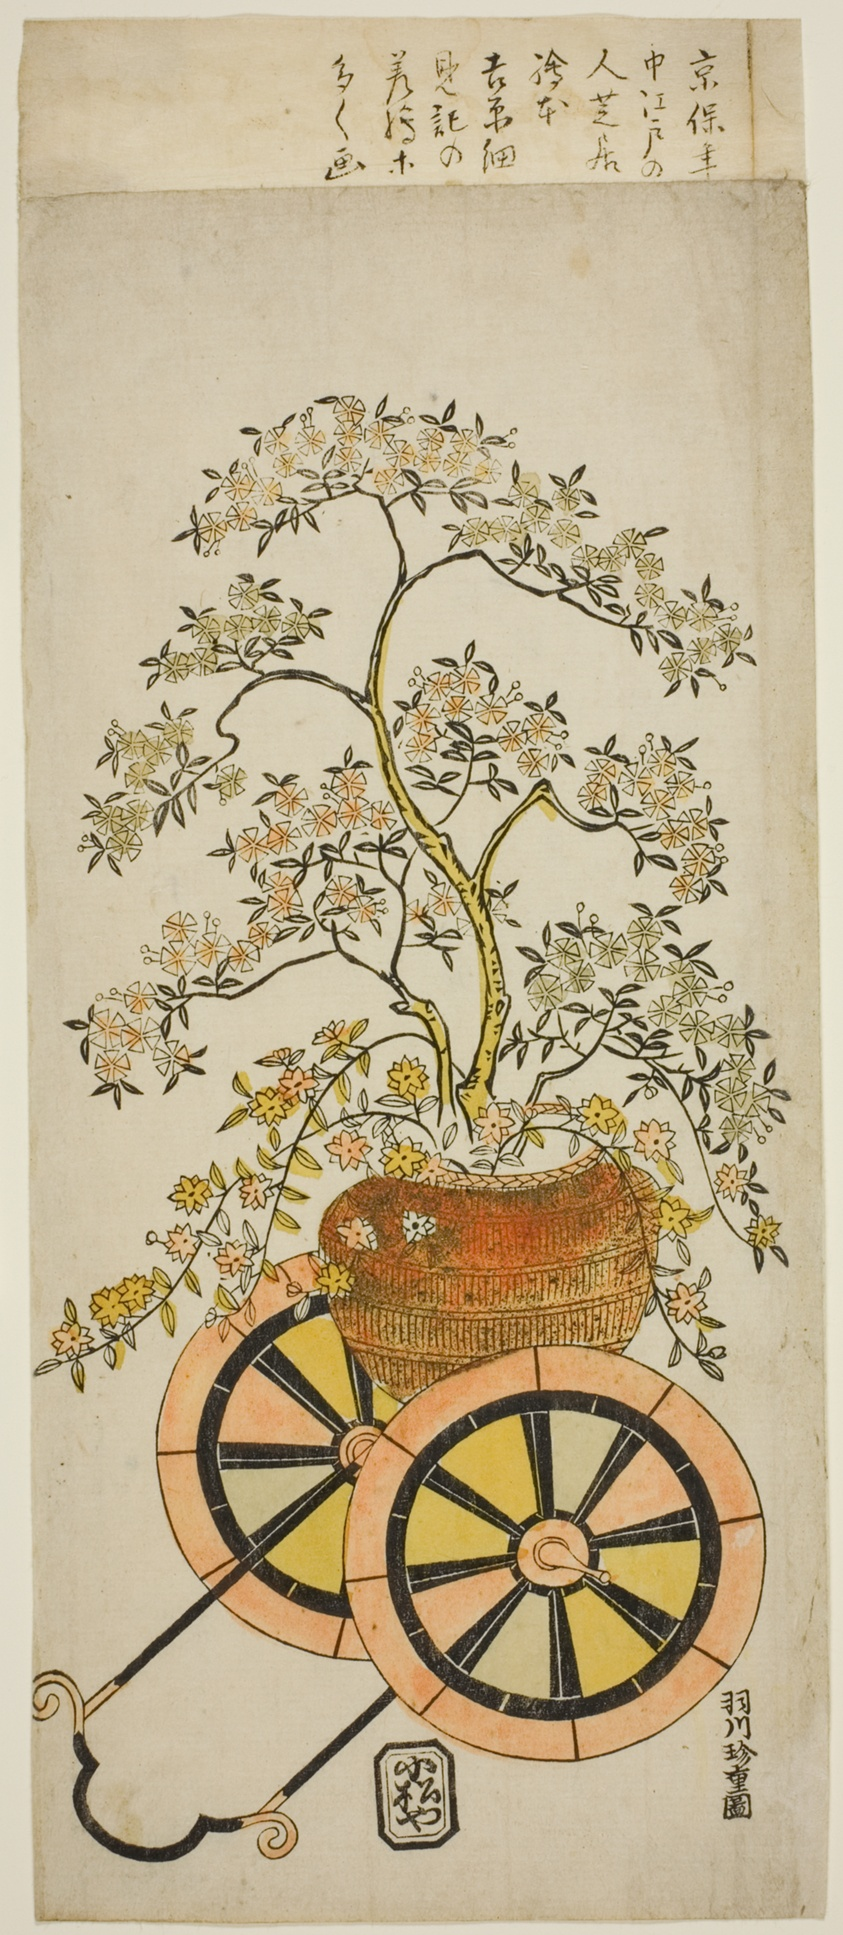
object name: Print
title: Flower Wagon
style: Japanese (culture or style)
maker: Hanegawa Chincho (Japanese, c.1679 -1754)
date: c. 1730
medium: Color woodblock print; hosoban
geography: Japan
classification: woodblock print; print; asian art